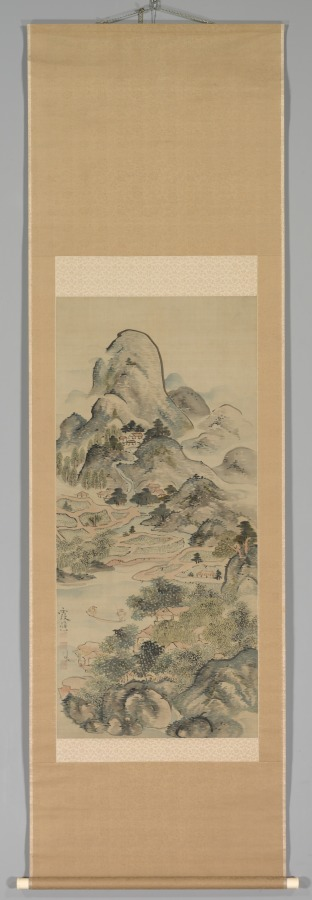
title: Fishing in Springtime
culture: Japan, Edo period (1615–1868)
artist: Ike Taiga (Japanese, 1723–1776)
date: 1700s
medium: Hanging scroll; ink and color on silk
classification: Painting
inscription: Signature: 霞樵, transliteration, Kashō; seals: 池無名印, transliteration, Ike Mumei in; 三岳道者, transliteration, Sangaku Dōja; 遵生, transliteration, Junsei.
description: Ike Taiga was subject to many artistic influences; we know he practiced Zen calligraphy from an early age, his father may have had ties to the famous painter Ōgata Kōrin (1658–1716), he may have trained under a Tosa school painter, and he is thought to have seen Western images early on that informed his approach in representing depth. Though he started with professional beginnings—making a living after his father’s death by selling paintings on fans—he surrounded himself with the members of the literati community, and never stopped absorbing stylistic influences from diverse sources throughout his career. As a result, his style is unique and aesthetically definitive of nanga—the name given to Japanese literati painting.